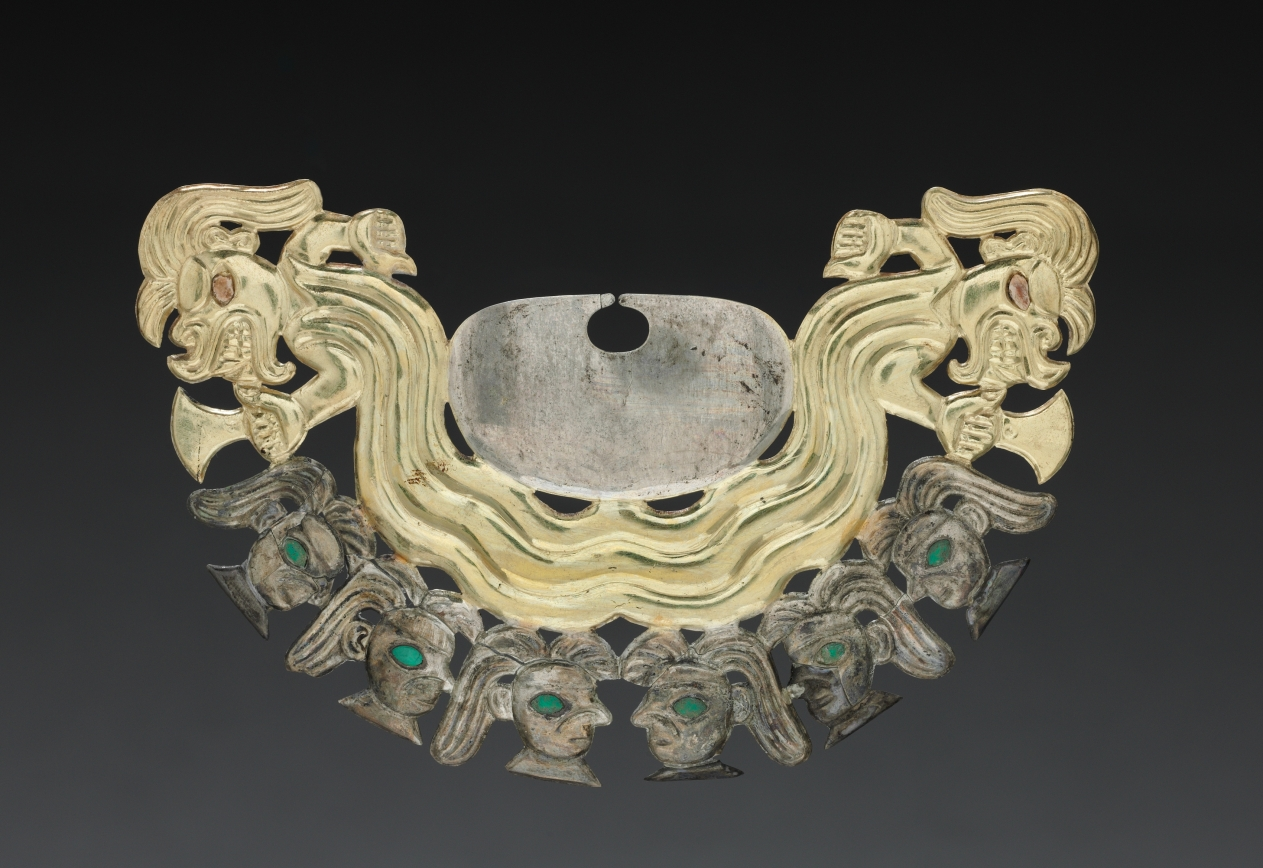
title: Nose Ornament with Decapitators and Human Heads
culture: Peru, North Coast, Moche culture (50–800 CE), early Intermediate Period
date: c. 100–300 CE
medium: gold alloy and silver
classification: Metalwork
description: A crucial element of Moche royal regalia was the nose ornament, whose imagery varies from benign to predatory. One ornament here depicts a human head, perhaps a ruler’s portrait, flanked by birds that attack human victims. In another, two supernatural decapitators brandish knives over a row of severed human heads. The third is an elegant composition that combines serpents with long-necked water birds. The Moche were among the Andes’ most inventive metalsmiths, and they developed many complex techniques for joining and enriching the surfaces of metals, which they usually worked by hammering rather than casting. The gold-and-silver ornaments were made by first joining gold and silver sheets through heating and hammering. Then came the relief decoration, followed by the selective removal of metal along the joins. Finally, the ornament was trimmed and polished.